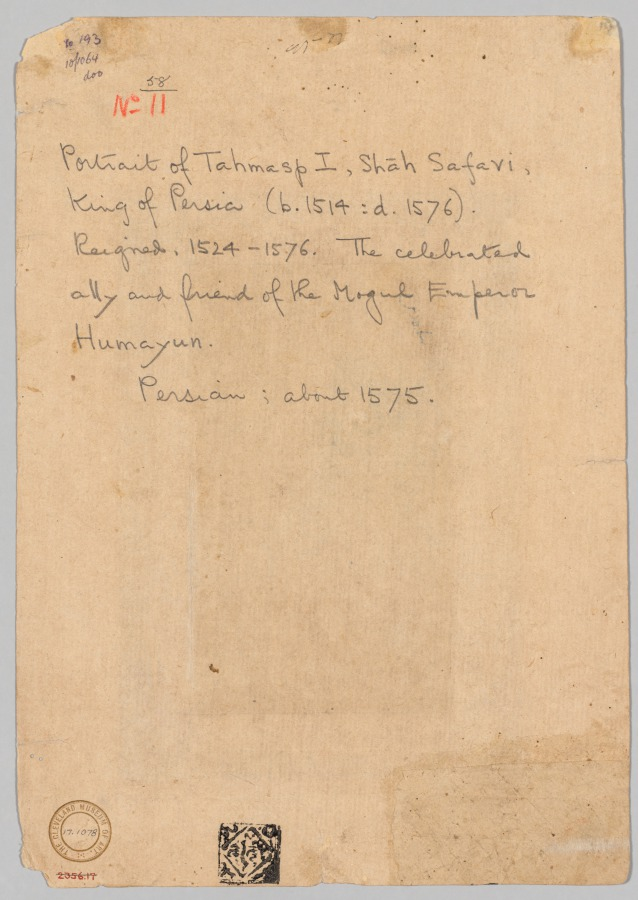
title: Shah Tahmasp I (1514–1576) Seated in a Landscape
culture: Iran, Qazvin, Safavid period (1501-1722)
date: c. 1575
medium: opaque watercolor and gold on paper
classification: Manuscript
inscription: Inscription in English, undated: "Portrait of Tahmasp I, Shāh Safavi, King of Persia (b. 1514: d. 1576). Reigned, 1524–1576. The celebrated ally and friend of the Mogul Emperor Humayun. Persian; about 1575."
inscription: [square black seal]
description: Shah Tahmasp I, the second ruler of Iran’s Safavid dynasty, is shown kneeling pensively on a carpet under a willow on the banks of a stream, a book at his side. The luxurious fabrics of his robe and his bolster pillow, with sprigs and cloud motifs in gold, indicate his wealth and privilege. Even the fine white cloth of his turban is edged in gold, topped by a small cluster of jewels.